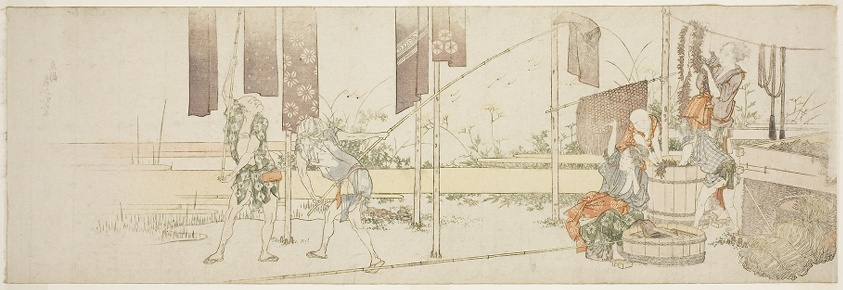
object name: Print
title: Hanging up dyed cloth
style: Japanese (culture or style)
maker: Katsushika Hokusai 葛飾 北斎; Japanese, 1760-1849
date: c. 1805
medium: Color woodblock print; nagaban, surimono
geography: Japan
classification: woodblock print; print; asian art